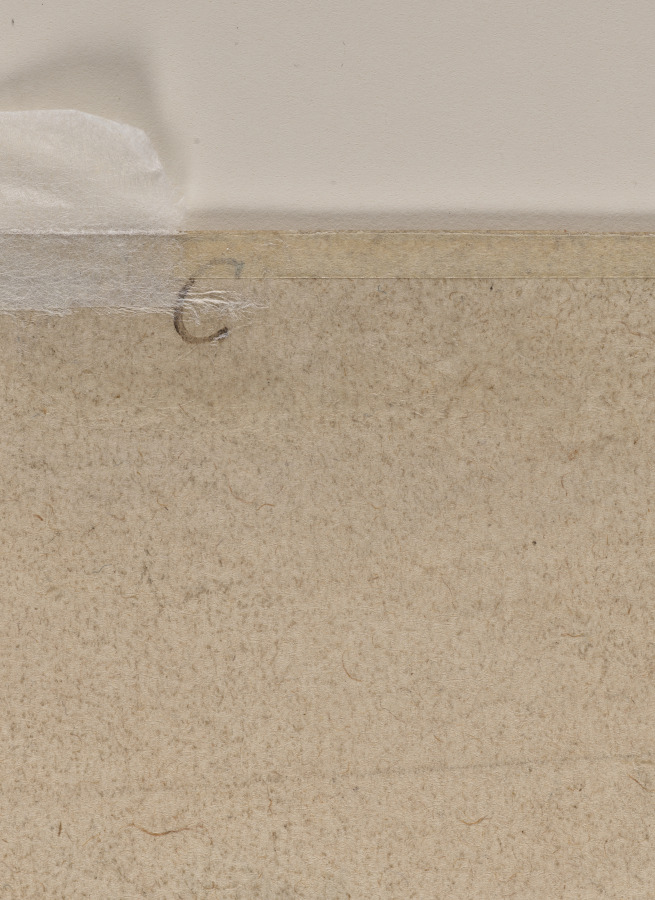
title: A Faun Grasping a Bunch of Grapes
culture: Flanders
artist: studio of Peter Paul Rubens (Flemish, 1577–1640)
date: after 1616–18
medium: black chalk and brush and brown wash; framing lines in pen and black ink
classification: Drawing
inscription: VERSO, upper right, in brown ink: no 40 ; lower left, in brown ink: 6/14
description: This drawing relates to a finished painting (now lost) by Peter Paul Rubens that depicted a faun (a woodland creature similar to a satyr) squeezing grapes into the mouth of a young Bacchus. That figure, shown here, could be Silenus, who educated Bacchus on the pleasures of wine, revelry, and nature. Rubens ran a large studio and employed numerous apprentices, one of whom may have made this copy after the original painting. As a form of instruction, Rubens added ink wash to the drawing to enhance the shading on the figure and shadows behind it.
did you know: Swirling draperies like the one haphazardly worn by this faun do more than conceal, in many cases they reveal an artist's technical skill. To render folds and gathers in fabric, artists used chiaroscuro, meaning contrasting light and dark tones.